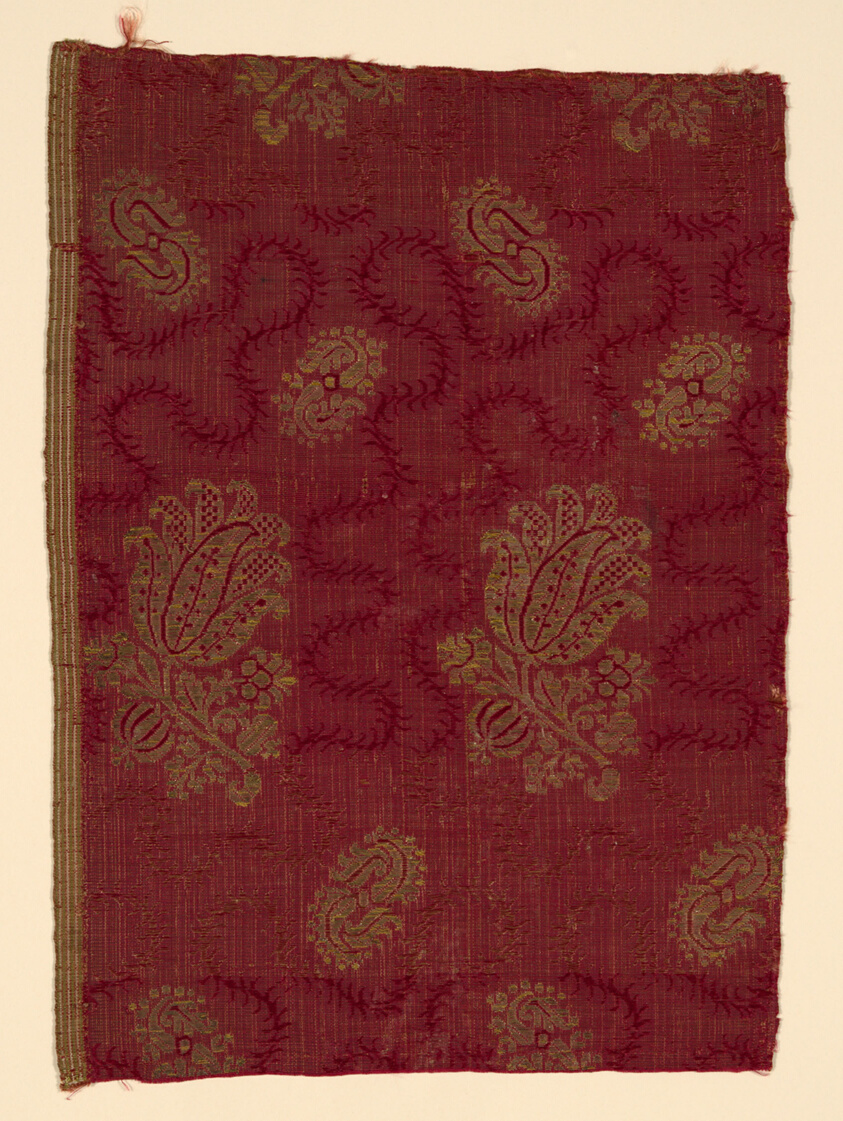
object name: Textile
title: Fragment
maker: Italy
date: 1650/1700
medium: Silk, gold gilt strips, and gold gilt strips wound around silk fiber core, plain weave with supplementary brocading wefts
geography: Italy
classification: textile; weaving